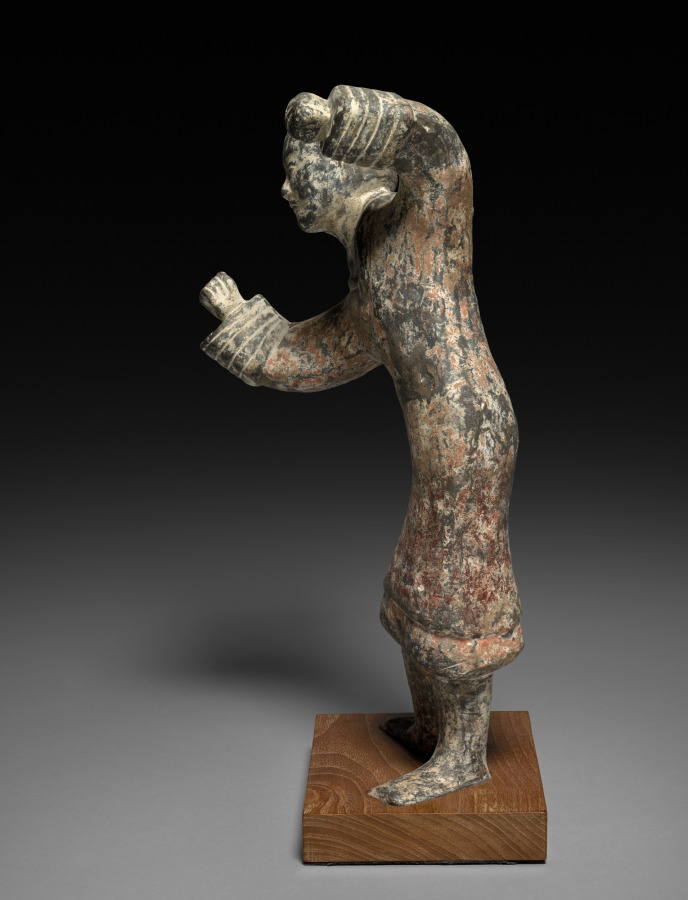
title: Dancing Figure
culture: China, style of Han dynasty (202 BCE–220 CE)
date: c. 1850–c. 1950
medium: painted plaster of Paris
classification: Sculpture